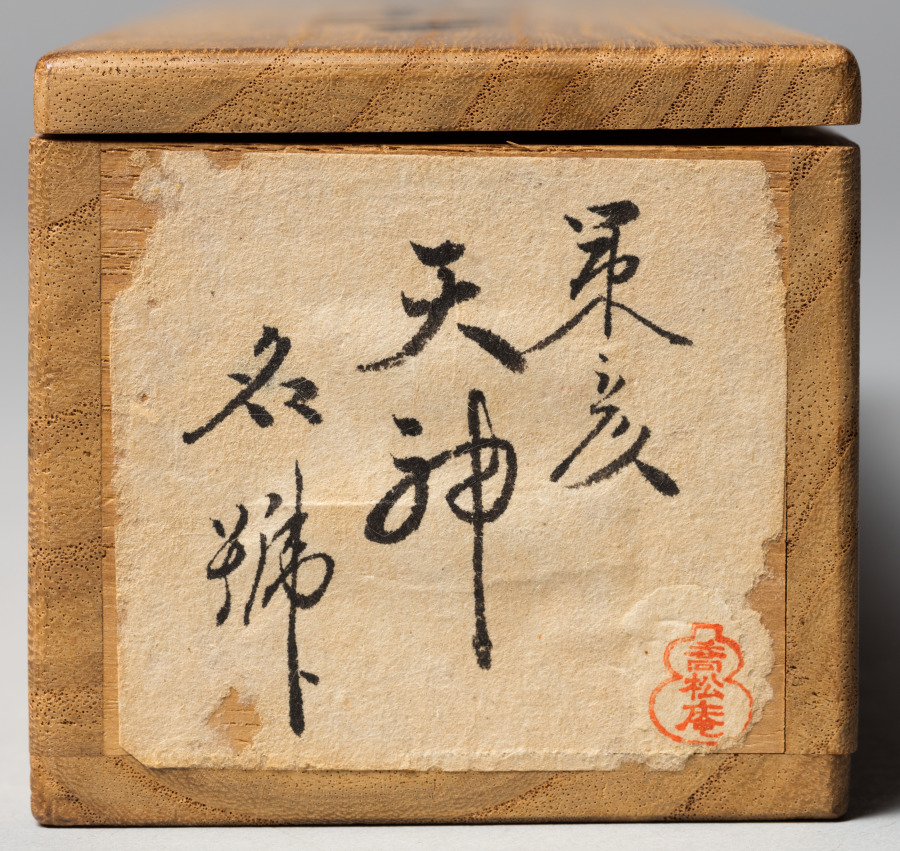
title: Sacred Name of Tenjin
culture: Japan, Muromachi period (1392–1573)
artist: Sakugen Shūryō (Japanese, 1501–1579)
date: 1500s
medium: hanging scroll; ink on paper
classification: Calligraphy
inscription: signed: signature unread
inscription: Sealed: Sakugen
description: The story emerged in the early 1300s that the kami Tenjin had traveled to China and achieved enlightenment under a famous Buddhist meditation master. Paintings of the subject as well as written invocations of Tenjin’s name were highly valued by the monks of Japan’s Zen Buddhist communities, to which an invocation of Tenjin’s name brushed by Zen monk Sakugen Shūryō attests. Sakugen was both a poet and an official envoy to Ming China in the 1500s. Creating calligraphies of deities’ names was akin to painting religious icons.